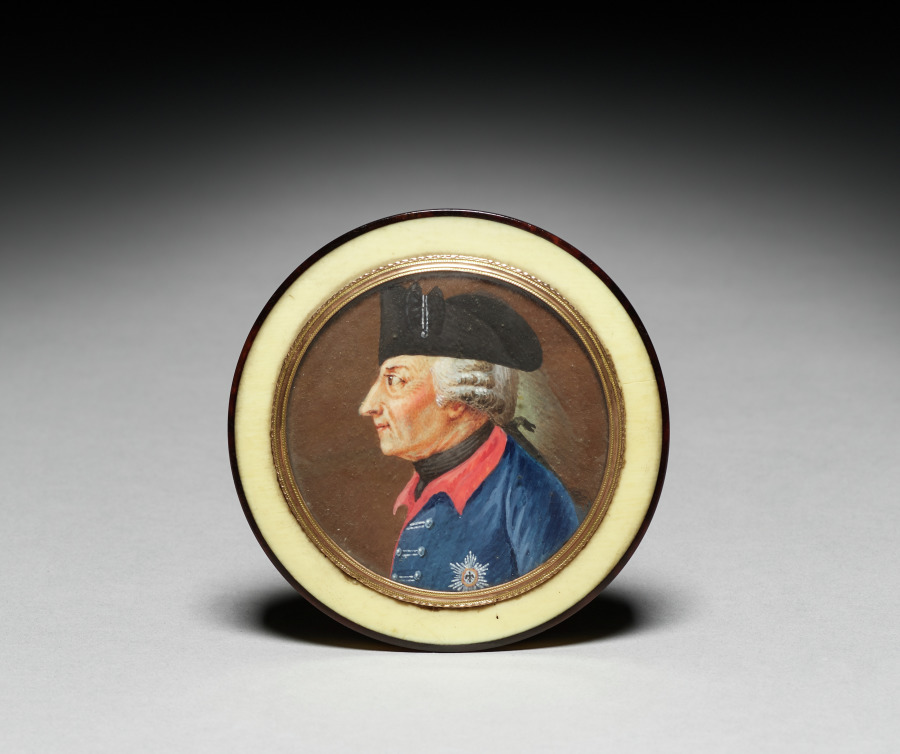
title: Cover for a Snuff Box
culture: Germany, 18th century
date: c. 1770–1775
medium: tortoiseshell and ivory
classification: Miscellaneous